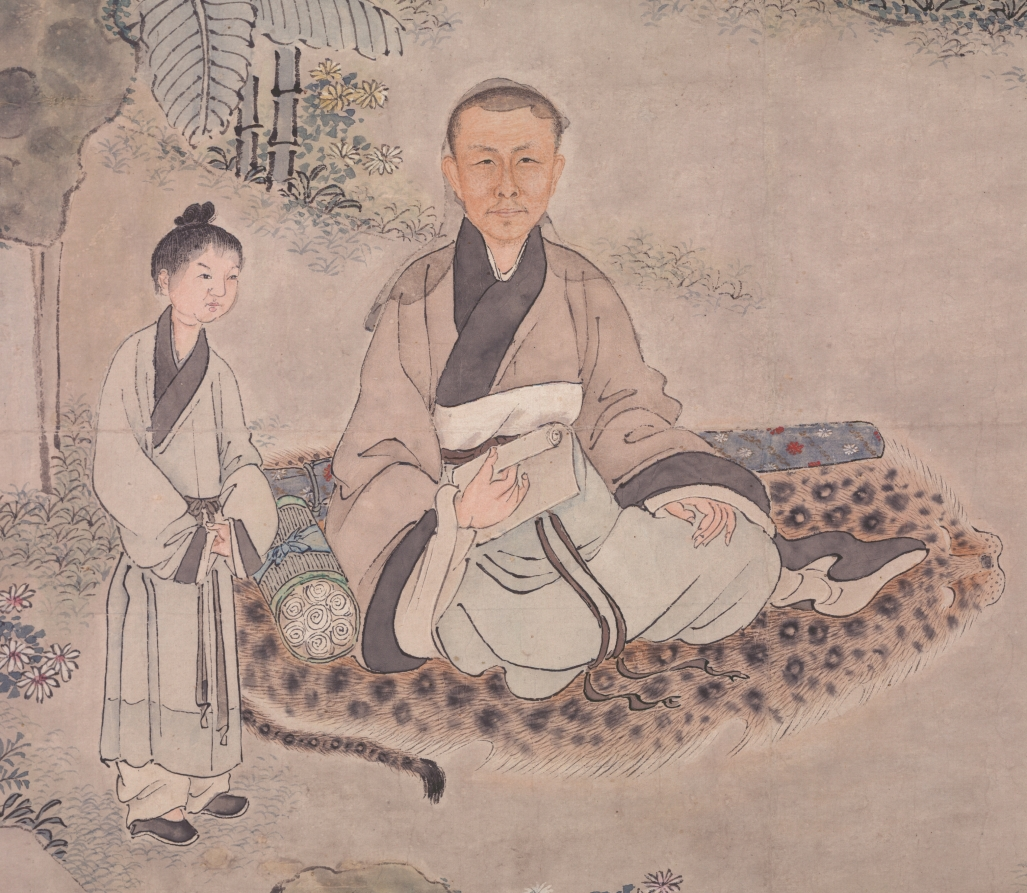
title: Portrait of An Qi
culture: China, Qing dynasty (1644-1911)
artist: Wang Hui (Chinese, 1632–1717)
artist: Tu Luo (Chinese, active c. 1715)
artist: Yang Jin (Chinese, 1644–1728)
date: 1715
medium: hanging scroll; ink and color on paper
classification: Painting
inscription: [印]上下千年. 麓村高逸：康煕乙未季春，廣陵涂洛寫照，海虞楊晉布景，八十四叟王翬補竹石。[印]耕煙; 王翬之印.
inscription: 俯視塵寰逸韻高，襟懷潚灑興偏豪。/ 琴書座右親風雅，竹石池邊拭羽毛。/ 蕉葉亂雲遮北礀，鶴翎凝雪戀東皋。/ 翩翩度量如君少，靜對秋江萬斛濤。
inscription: 知君頗好道，作意洗緐縟。/ 遂窮林亭勝，翛然契幽獨。/ 自得會忘言，餘善時往復。/ 岸幘若有期，把卷一停讀。/ 鶴馴行載正，雲閑斷還續。/ 橘柚欎寒煙，芭蕉瀉深綠。/ 石橋逕屢迴，暗水流亦曲。/ 真心恣奇探，曠景縱遐矚。/ 陶謝不可作，此旨更誰屬。/ 眷焉展斯圖，令我怡心目。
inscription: 逸興迥絶塵，風流仰高躅。/ 側無鹿角巾，横呈豹皮褥。/ 胸藏山壑富，座列琴囊足。/ 橙懸萬顆黄，蕉散一叢綠。/ 泉清鶴景長，樹遠雲光續。/ 披圖識性情，伊人温似玉。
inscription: 風雅出塵寰，披圖見一斑。/ 橘香新雨後，竹影夕陽間。/ 流水鳴前澗，歸雲渡遠山。/ 幽棲如可遂，應許共追攀。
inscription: 蕭灑披襟坐，琴書逸興長。/ 衫分蕉葉碧，冠學竹皮黄。/ 高樹穿雲斷，流泉帶菊香。/ 幽懷真曠達，何地不羲皇。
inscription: 秋色滿林壑，孤琴獨玄閒。/ 境歸簪紱外，道在水雲間。/ 棄智如藏璞，栖心静若山。/ 看君此圖畫，永以謝塵顏。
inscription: 修竹叢蕉坐綠天，君容早歳已如仙。/ 山中寄謝王摩詰，頭白方知住輞川。/ 千樹勝封萬戸侯，西風載滿李衡舟。/ 看君高致輕軒冕，坐享江鄉富貴秋。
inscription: 6 seals unidentified.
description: An Qi, the subject of the portrait, was a second-generation salt merchant from Korea. He used part of his wealth to collect art. At the time this painting was commissioned, An was less than 40 years old. He is represented as a Daoist recluse in nature, informally dressed with attributes such as books and a wrapped guqin instrument, a portrait convention for literati-scholars since the Six Dynasties period (220–589 CE). The local Taihu rock, banana plants, and crane suggest a southern garden and a life in seclusion. An’s portrait is evidence of merchants aspiring to the scholar-official class. According to the inscription, this painting was the joint effort of three men, the eldest and most famous was Wang Hui. While the garden setting is homogenous in style, it contrasts with the application of opaque pigments and shading employed for the depiction of An Qi’s face.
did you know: Seven of An Qi's close friends wrote poetic inscriptions on the silk brocade mount around his portrait.